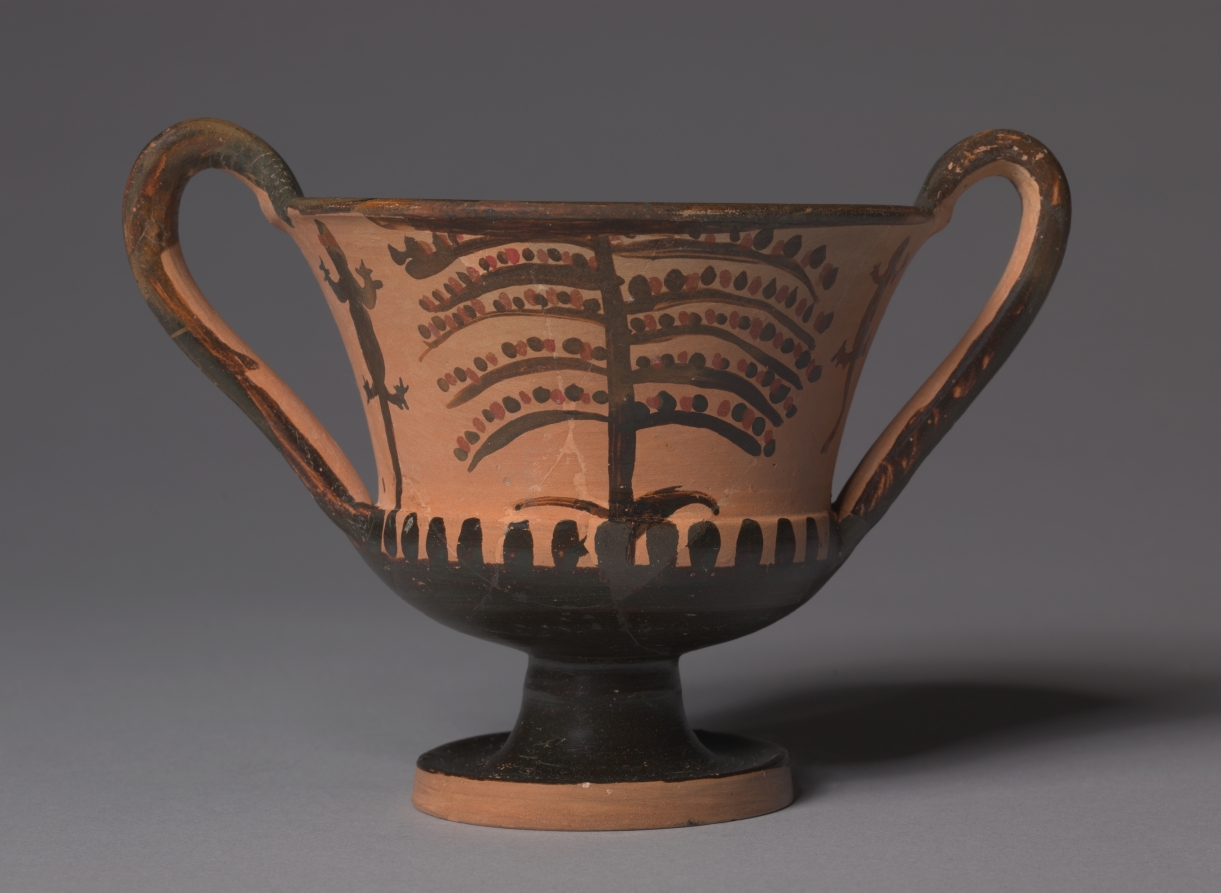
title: Black-Figure Kantharos (Drinking Cup): Lizards Flanking Tree (A); Ducks (B)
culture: Greek, Boiotian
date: c. 500 BCE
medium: ceramic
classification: Ceramic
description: Known as a kantharos and often associated with the wine god Dionysos and the hero Herakles, this type of two-handled drinking cup was particularly popular in Boiotia, a region of central Greece northwest of Athens. Also typical of Boiotia is simple black-figure silhouette decoration, without incision. Here and elsewhere, though, Boiotian vase-painters used red paint for additional detail; note the alternating tree leaves, lizard eyes and spots (on the right), and duck eyes.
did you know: Kantharos, the Greek word for this type of cup, also refers to a dung beetle.